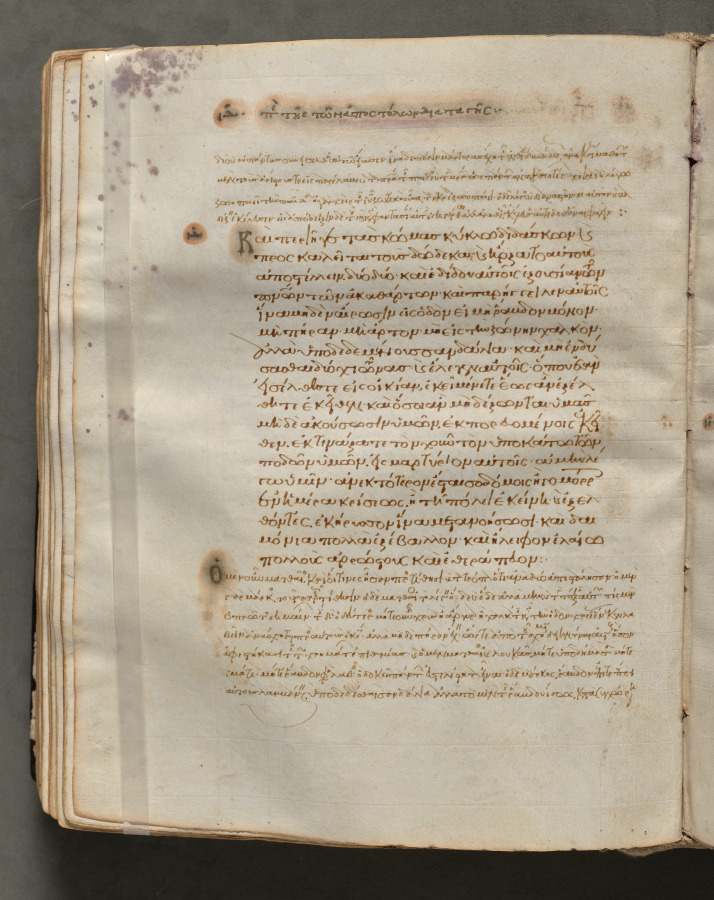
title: Text, folio 150 (verso), from a Gospel Book with Commentaries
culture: Byzantium, Constantinople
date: c. 1000–1100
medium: ink, tempera, and gold on vellum; leather binding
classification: Bound Volume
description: Each of the four gospels in this book opens on a page with brilliantly illuminated borders depicting the author of the text as well as birds-principally peacocks, symbols of the immortality of the soul-and fountains, representing the fountain of life and the salvation of the soul. This volume consists of 428 leaves with texts in Greek. Its level of sophistication suggests that it was probably written and decorated in a monastery in Constantinople.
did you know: Gospel Books were carried in procession through Byzantine churches.